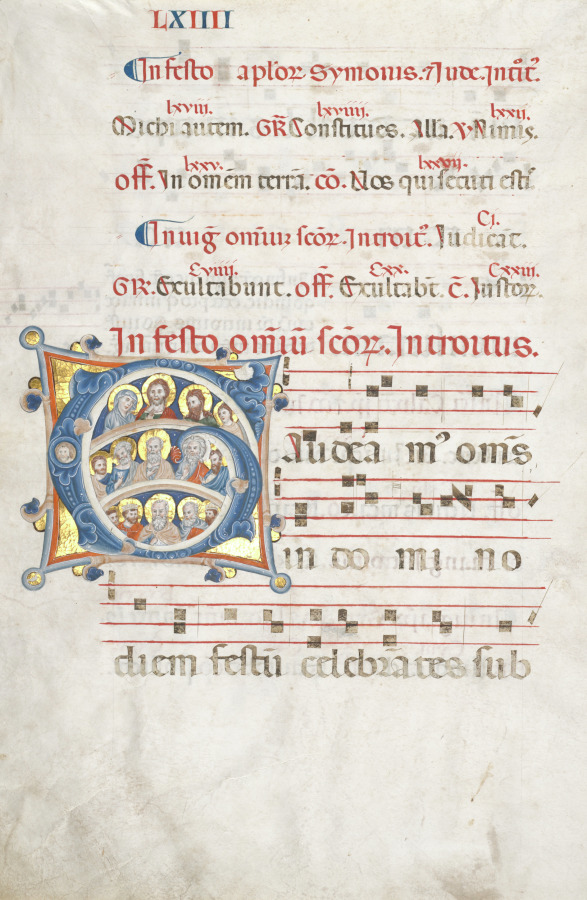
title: Bifolio from a Gradual: Initial (G) with Christ, the Virgin, and Apostles and Initial (O) (recto)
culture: Italy, Siena(?)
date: c. 1300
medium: Ink, tempera, and gold on vellum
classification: Manuscript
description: The large decorated initial G introduces the text, Gaudeamus omnes in Domino (Let us rejoice in the Lord). It is the beginning of the opening prayer, or introit, of the Mass for the Feast of All Saints (November 1). The figures within the initial include Christ, the Virgin Mary, and various saints.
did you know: Words written in red ink, called rubrics, indicate titles and chapter headings that are not part of a manuscript’s main text.